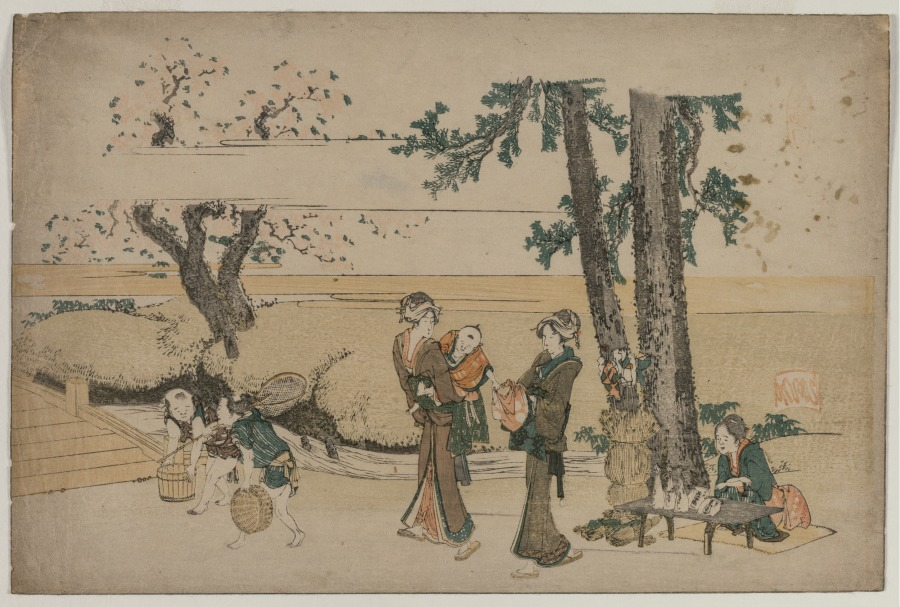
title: Woman Passing a Roadside Shop Near Oji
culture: Japan, Edo period (1615–1868)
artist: Katsushika Hokusai (Japanese, 1760–1849)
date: early 1800s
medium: color woodblock print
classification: Print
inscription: Signature: Hokusai (in syllabary as seal at right)